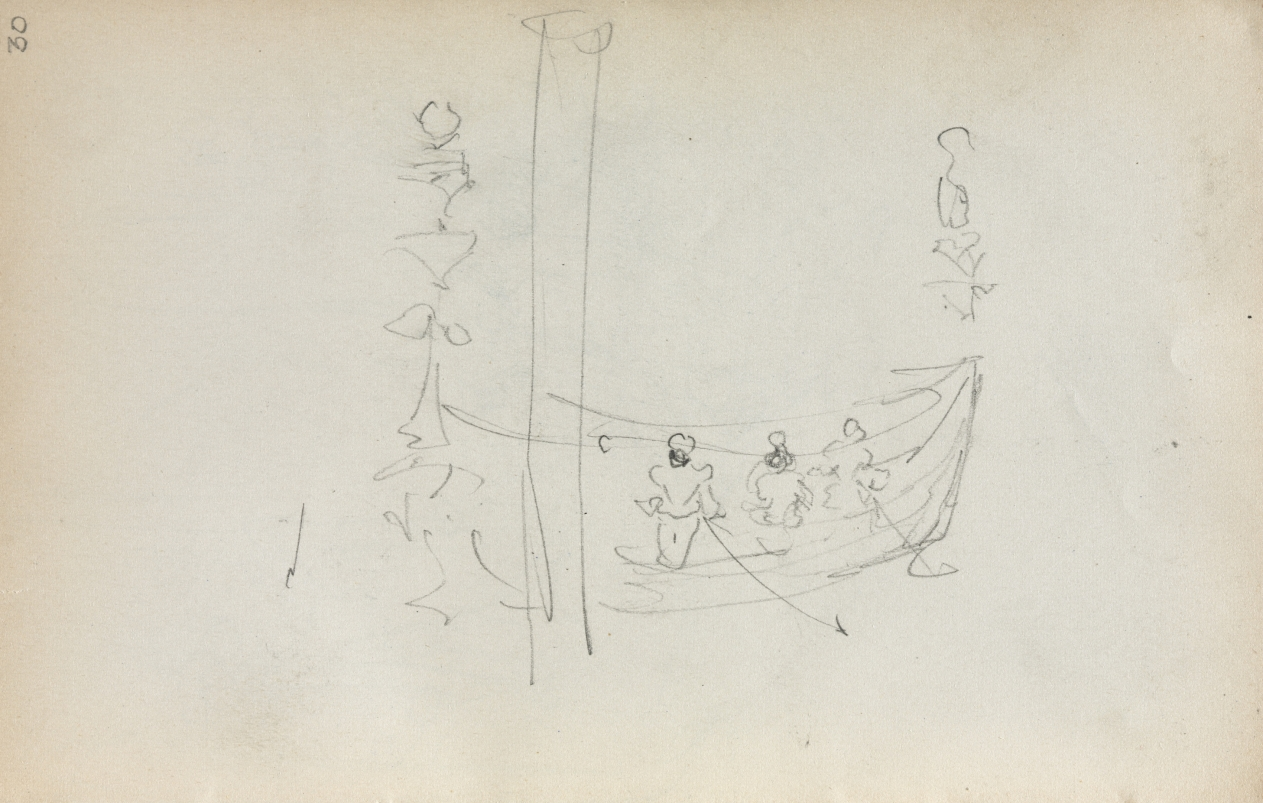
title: Italian Sketchbook: Venetian Boat (page 30)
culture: America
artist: Maurice Prendergast (American, born Newfoundland [now Canada], 1858–1924)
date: 1898–1899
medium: pencil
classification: Bound Volume